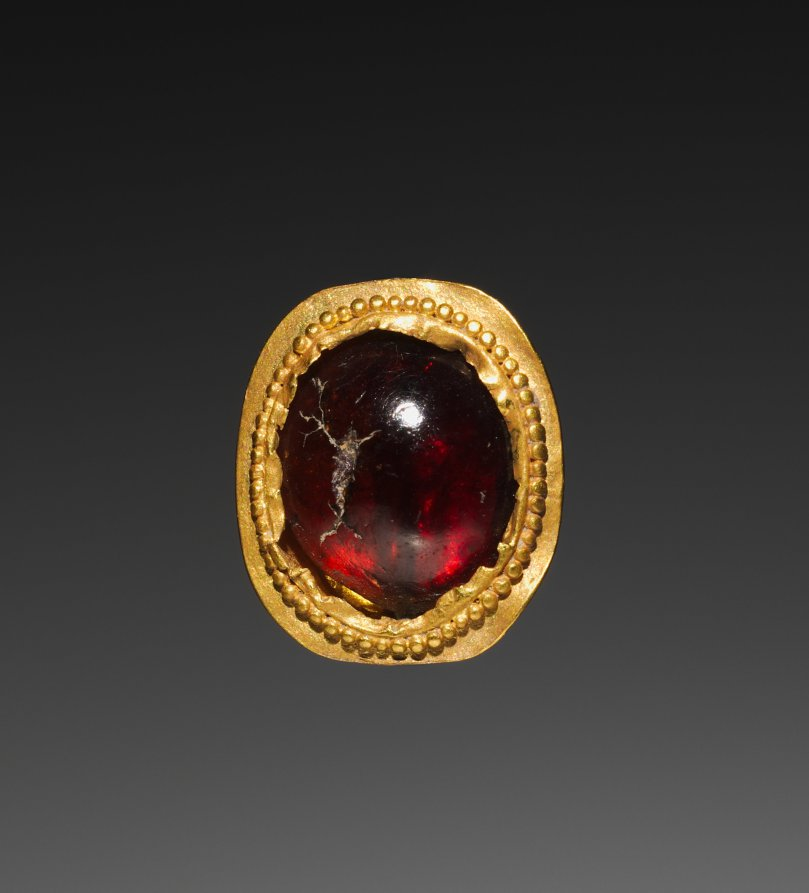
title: Garnet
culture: Parthian Empire (247 BCE–224 CE)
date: 1–200 CE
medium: gold and garnet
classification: Jewelry